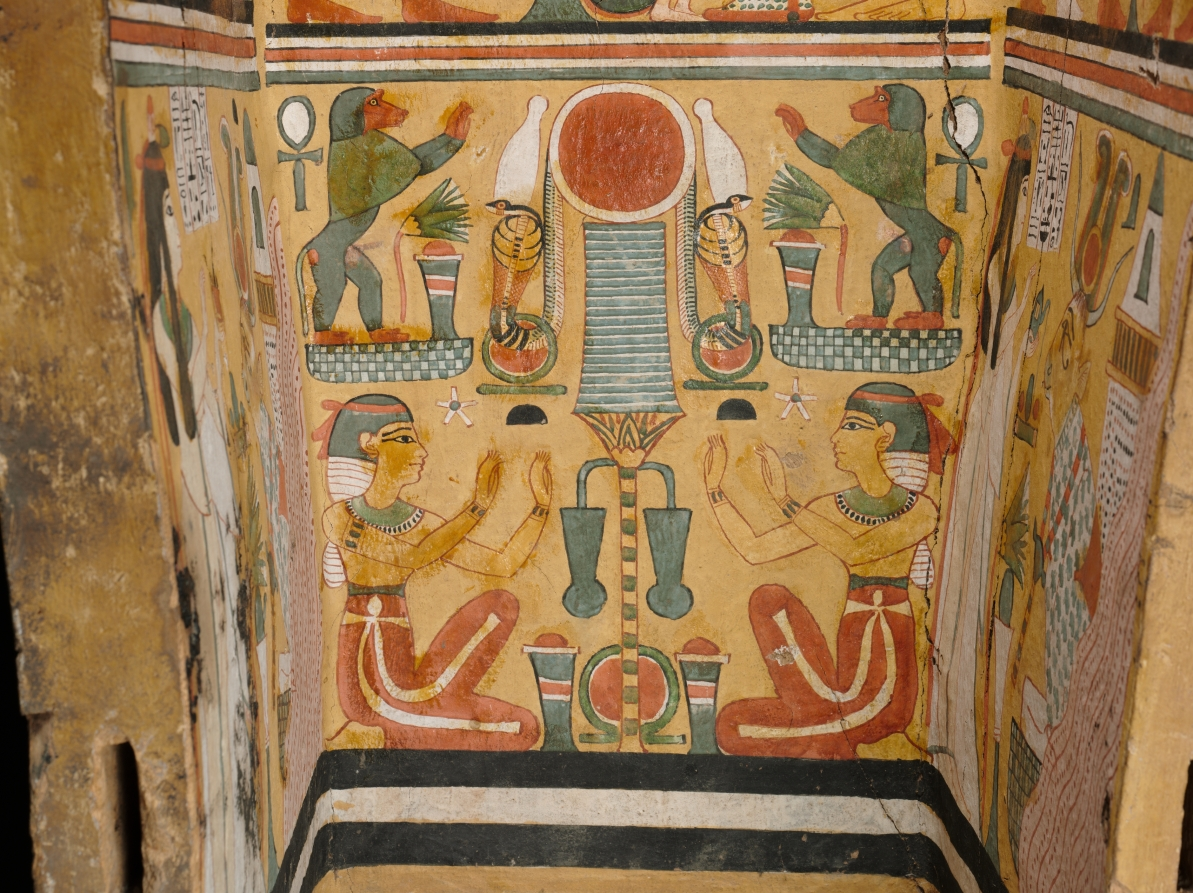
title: Coffin of Nesykhonsu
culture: Egypt, Thebes, Third Intermediate (1069–715 BCE), Dynasties 21–22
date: c. 976–889 BCE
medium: gessoed and painted sycamore fig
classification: Funerary Equipment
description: Egyptian coffins told stories and illustrated spells to help the deceased transition safely to the afterlife. Inside Nesykhonsu's coffin there are two jackals, one facing right and the other left, near the top. Here, the jackal represents the powerful deity Anubis, the god of the afterlife and embalming.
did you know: Two of Nesykhonsu's titles, "Lady of the House" and "Singer of the Choir of Mut the Great," are written on the outside of the coffin.